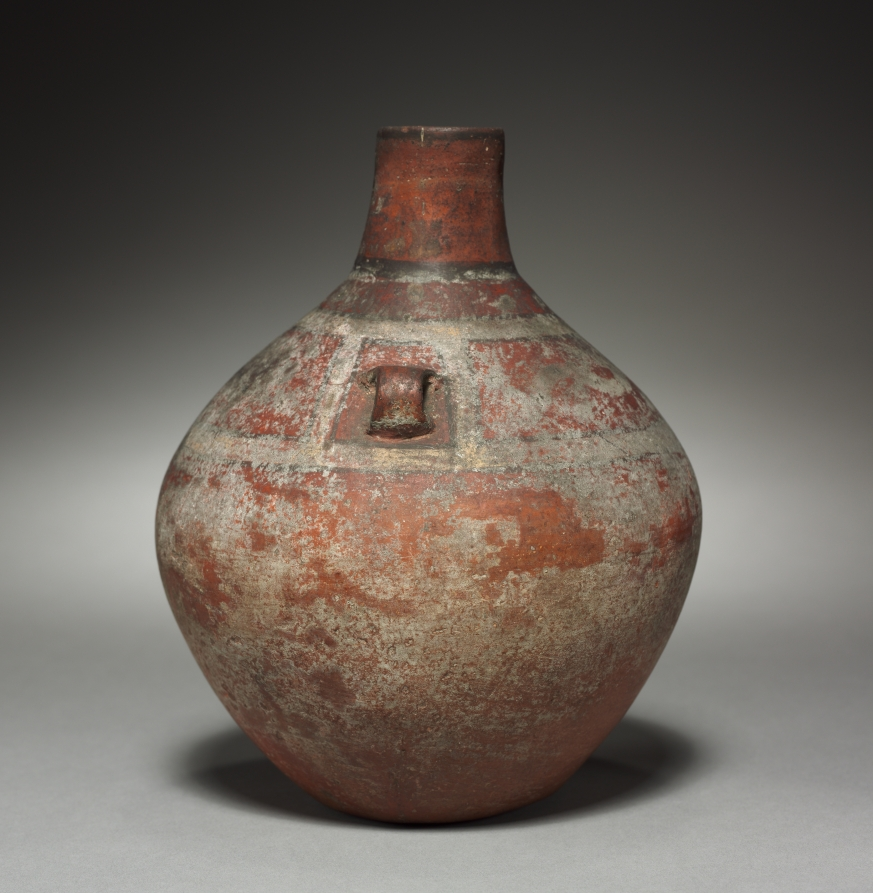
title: Bottle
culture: Peru, Pachacamac, Tiwanaku style, 400-1000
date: 400–1000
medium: pottery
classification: Ceramic